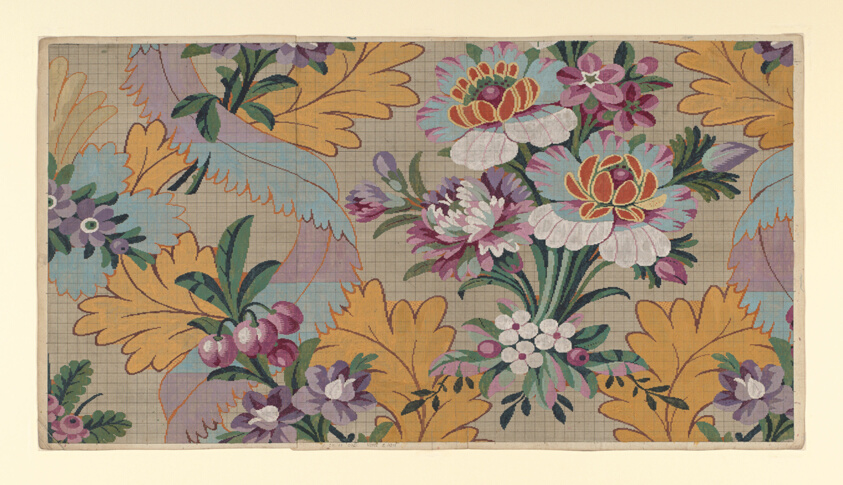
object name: Drawing and Watercolor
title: Mise-en-carte (Point-paper)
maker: France, Lyon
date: 1760/90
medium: Ink and gouache on hand drawn graph paper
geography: France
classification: textile; accessory - paper design